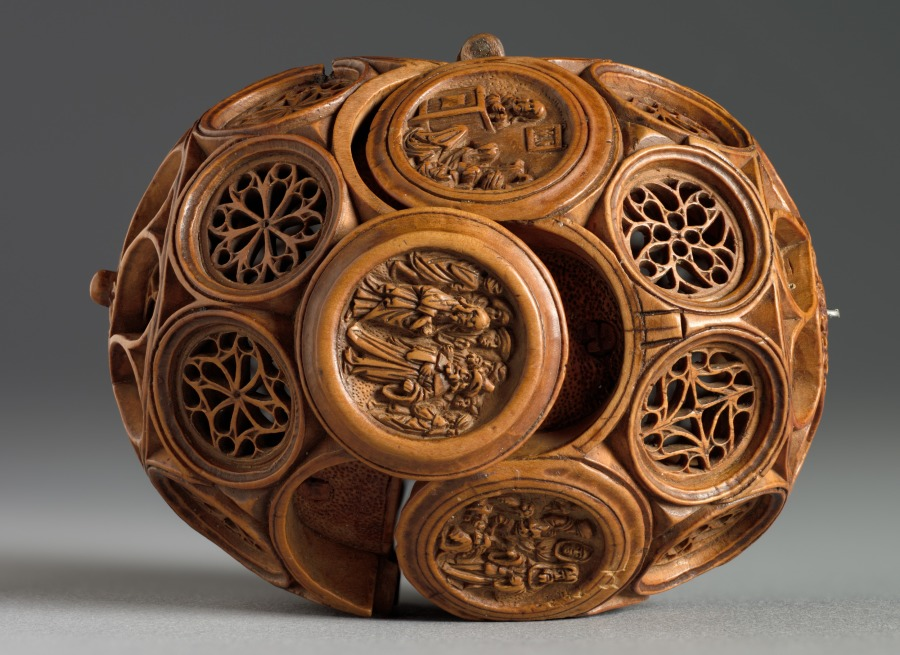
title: Prayer Nut with Scenes from the Life of St. James the Greater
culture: Northern Netherlands (Holland)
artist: Adam Dircksz (Netherlandish, active c. 1500)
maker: and Workshop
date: c. 1500–1530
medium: boxwood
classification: Sculpture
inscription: Interior around lower half: SANCTVS SACRILEGI STAT IVDICIS ANTE TRIBVNAL (Holiness stands before the throne of the profane judge)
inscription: Interior, around upper half: GAVDENS PRO CRISTO IACOBVS SVBDIT CAPVT ENSI (St James submits his head to the sword)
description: Prayer nuts are capsules that can be opened in half and were mainly worn from the end of the 1400s until 1530, particularly in the Netherlands. These objects are generally made from boxwood and carved with extreme refinement and delicacy. They often echo Gothic architecture and include openwork tracery or elaborate decorative patterns. Prayer nuts came into fashion for private devotion as a pendant on the rosary or on a decorative chain. The emergence of prayer nuts went hand in hand with the practice of praying the rosary more frequently at the end of the Middle Ages.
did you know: This miniature masterpiece was held and caressed within the palm of the holder as they prayed and meditated on their faith. What do you use to focus or engage in quiet concentration?